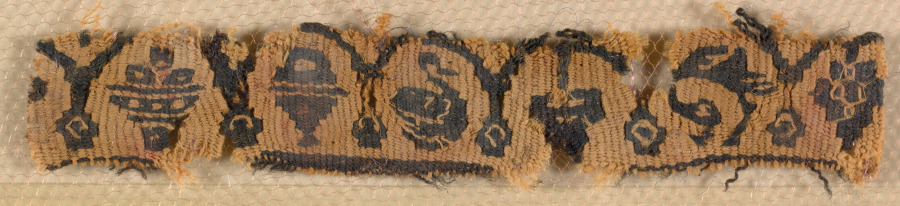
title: Fragment, Sleeve Ornament from a Tunic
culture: Egypt, Byzantine period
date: 500s - early 600s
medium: tapestry (probably originally inwoven in tabby ground); wool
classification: Textile